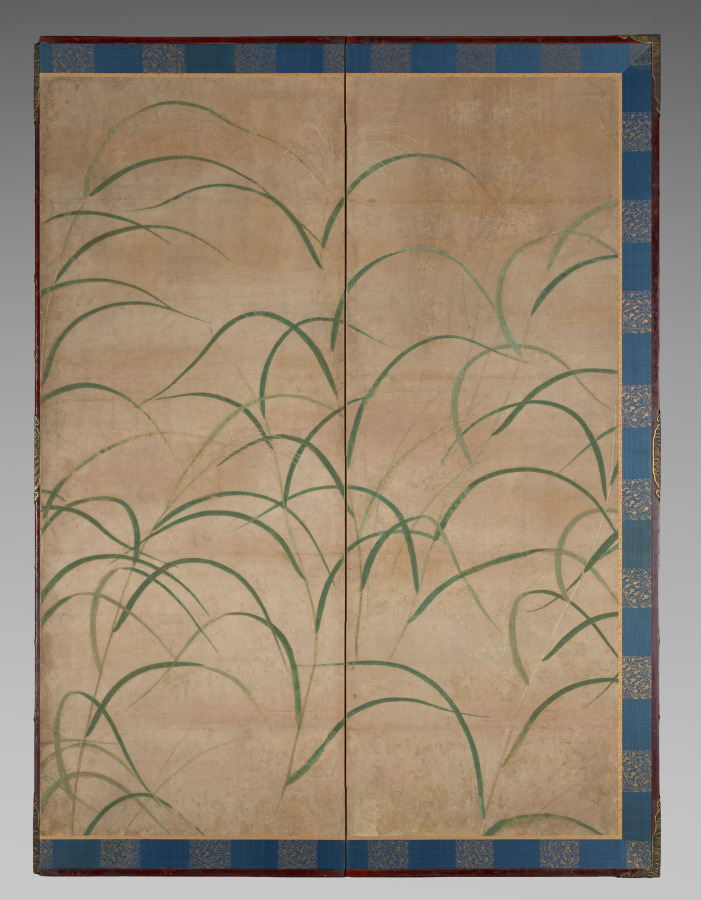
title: Susuki Grass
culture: Japan, Muromachi period (1392–1573)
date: c. 1525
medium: One of a pair of six-panel folding screens; ink, color, and gold on paper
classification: Painting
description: Susuki grass has a seasonal association with autumn in the Japanese visual and literary tradition. It is one of the “Seven Flowers of Autumn,” along with bush clover, arrowroot, pink, patrinia, mistflower, and bellflower. This composition immerses the beholder in a field of grasses and golden bands of mist. The design may have served as a backdrop for poems brushed in ink on decorated papers and attached to the surface of the screens, a practice with a long tradition in Japan.